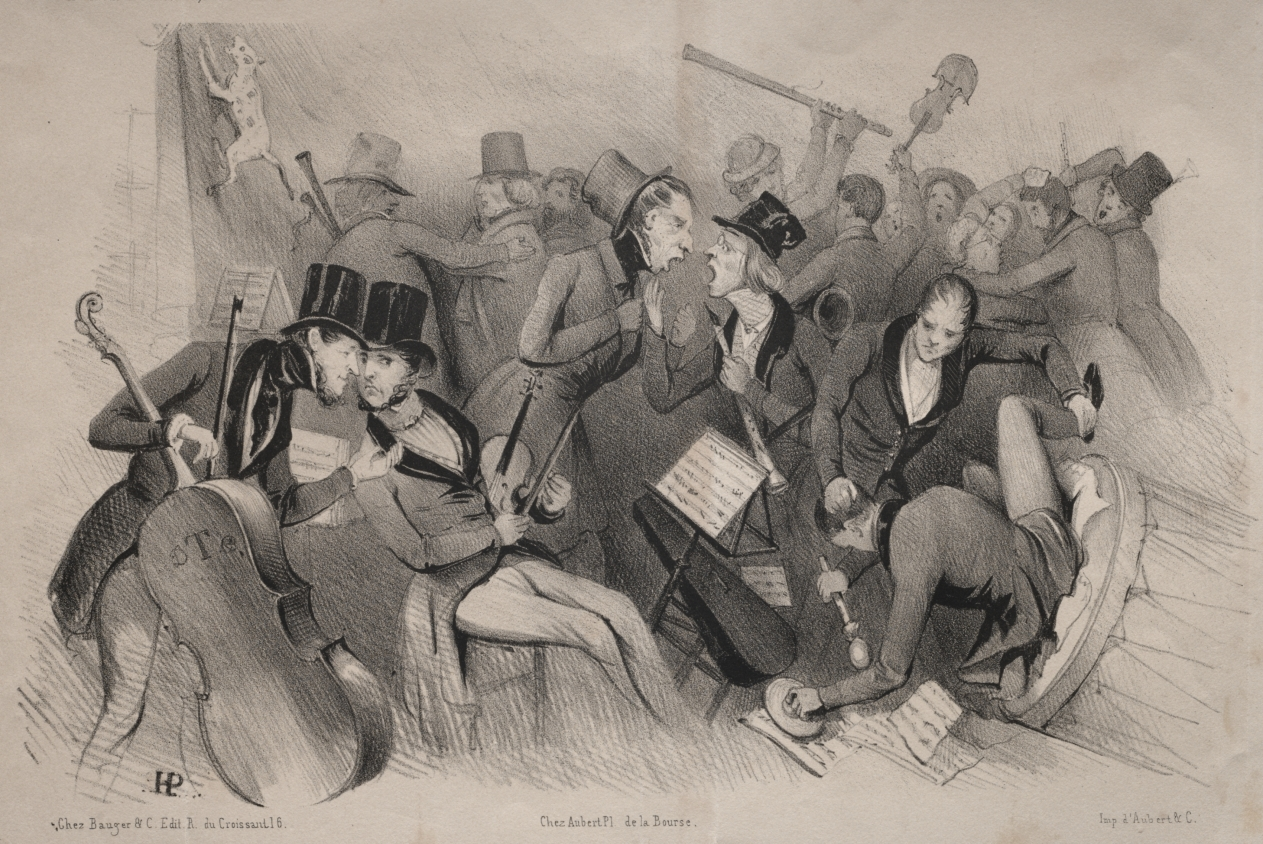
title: Actualités: Société philharmonique de province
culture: France, 19th century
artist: Jules Platier (French)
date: 1841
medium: lithograph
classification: Print